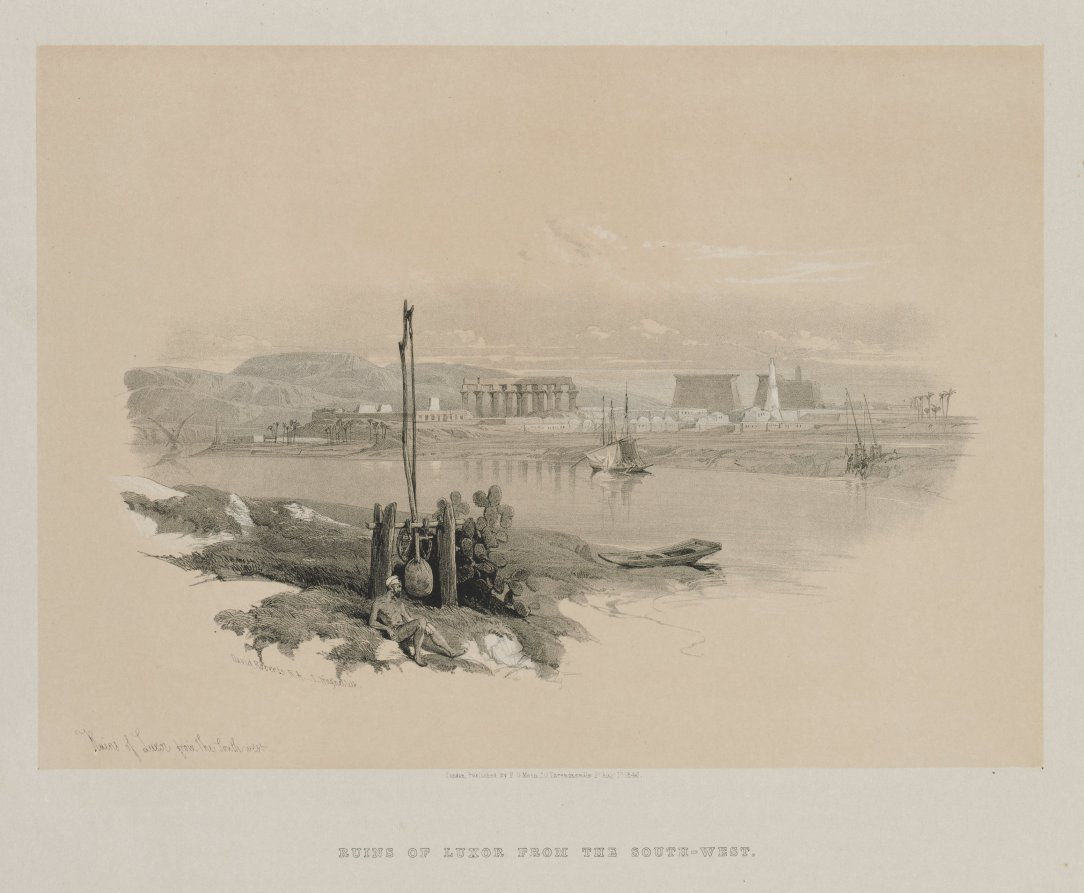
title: Egypt and Nubia, Volume I: Ruins of Luxor from the South-West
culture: England, 19th century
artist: Louis Haghe (British, 1806–1885)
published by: F. G. Moon, 20 Threadneedle Street, London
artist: after David Roberts (Scottish, 1796–1864)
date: 1846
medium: color lithograph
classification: Print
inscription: Insribed on plate: bottom left corner: 19